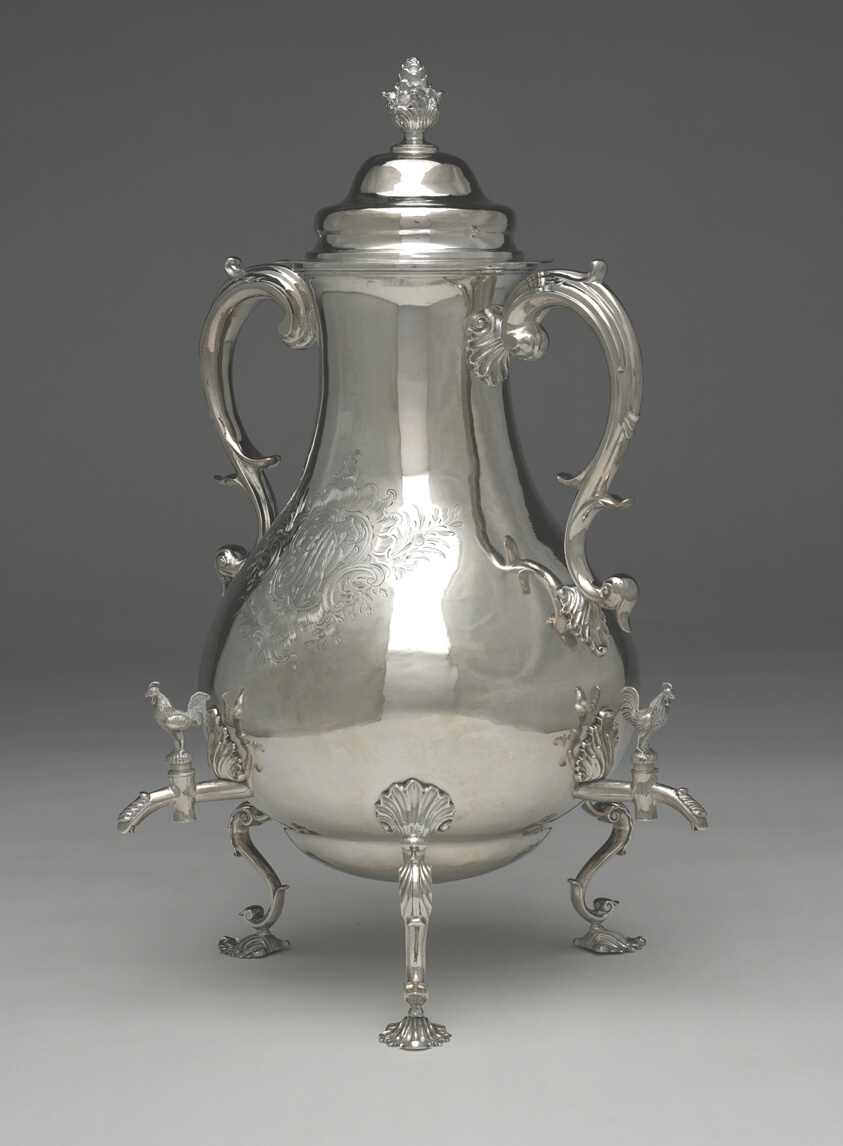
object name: Metalwork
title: Urn with Cover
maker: Ephraim Brasher; American, 1744–1810; New York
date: c. 1770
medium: Silver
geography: New York City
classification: vessel for serving drinks; silver; american decorative arts; american arts; decorative arts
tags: dining, drinking